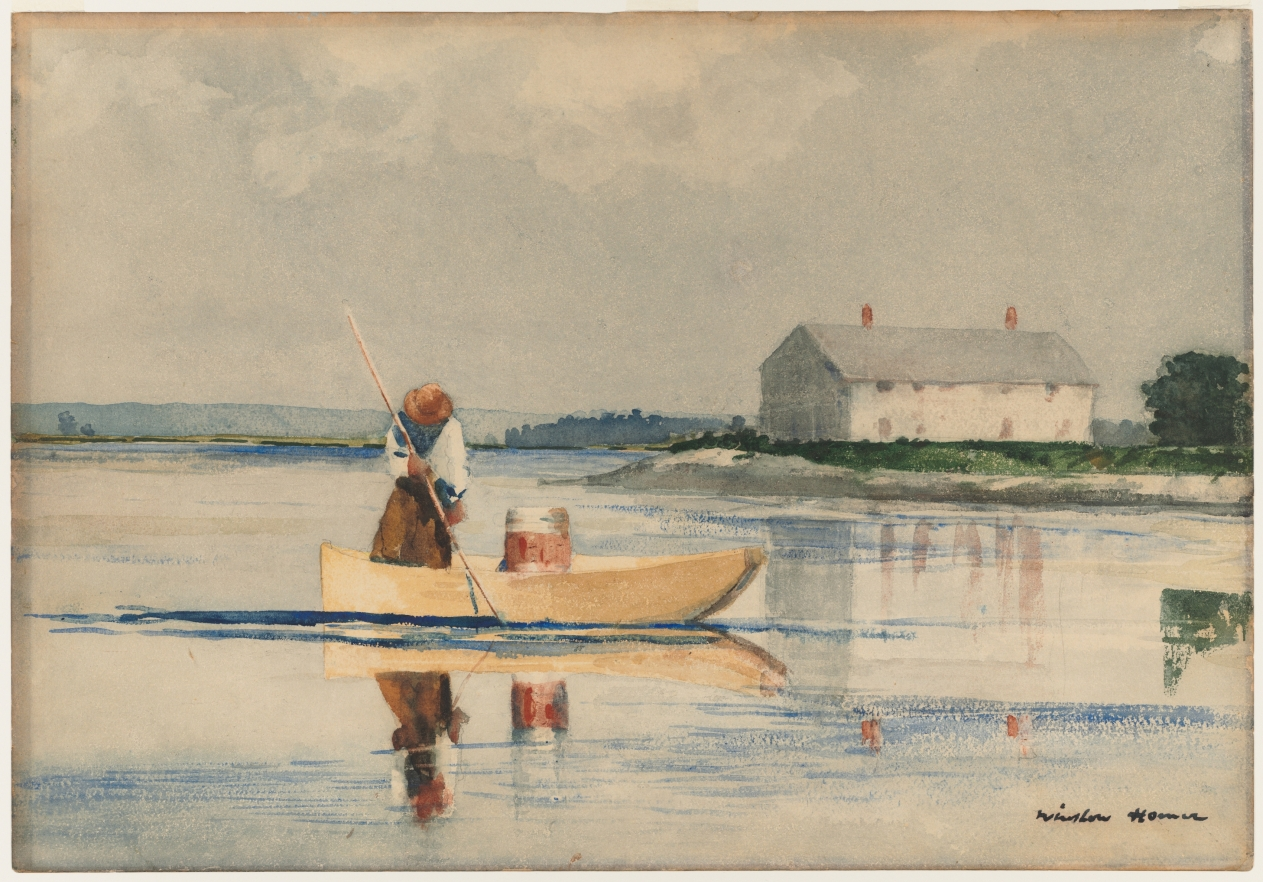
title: Spearing Eels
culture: America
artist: Winslow Homer (American, 1836–1910)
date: late 1800s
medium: watercolor with graphite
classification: Drawing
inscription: lr: Winslow Homer; rev: Scarboro, Maine, 2 miles from Prout's Neck, Tom Lee spearing eels